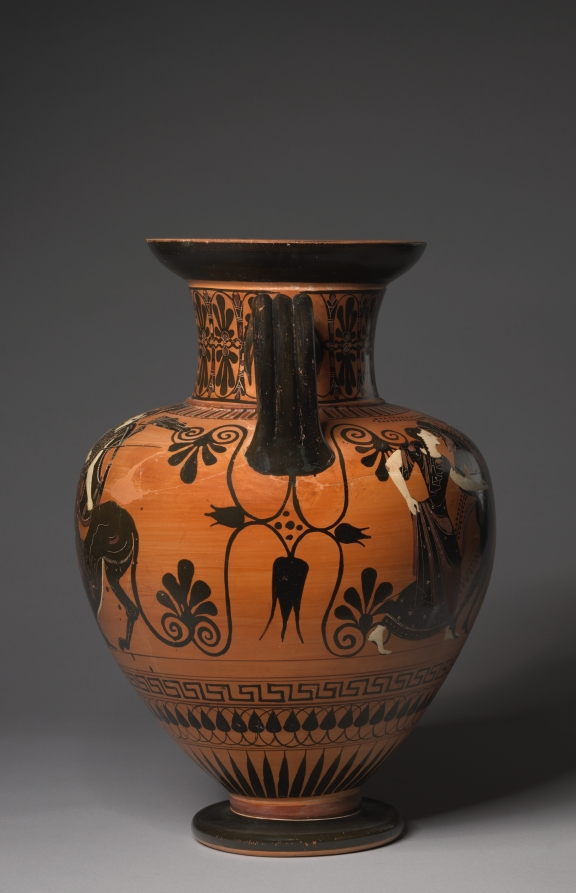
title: Black-Figure Neck-Amphora (Storage Vessel): Herakles and Nemean Lion (A); Dionysos, Satyrs, and Maenads (B)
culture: Greek, Attic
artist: attributed to Painter of Berlin 1899 (Greek, Attic)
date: 515–510 BCE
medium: ceramic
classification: Ceramic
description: The neck-amphora, one of the most popular vase shapes in Archaic Athens, provided painters with ample space for both figural and ornamental decoration. Herakles, the greatest of Greek heroes, performs his most famous deed on the obverse, wrestling the Nemean lion. His patron goddess Athena, together with his nephew Iolaos, holding the hero’s club, stand by. On the other side is an unrelated scene, showing the wine god Dionysos with dancing maenads and satyrs. Abundant ornament covers other areas: stylized lotus blossom and palmette chains on the neck; intricately linked palmettes and lotuses beneath each handle; and a key pattern, linked lotus buds, and rays on the lower body.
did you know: After Herakles strangled the Nemean lion, he wore its pelt as a protective trophy.